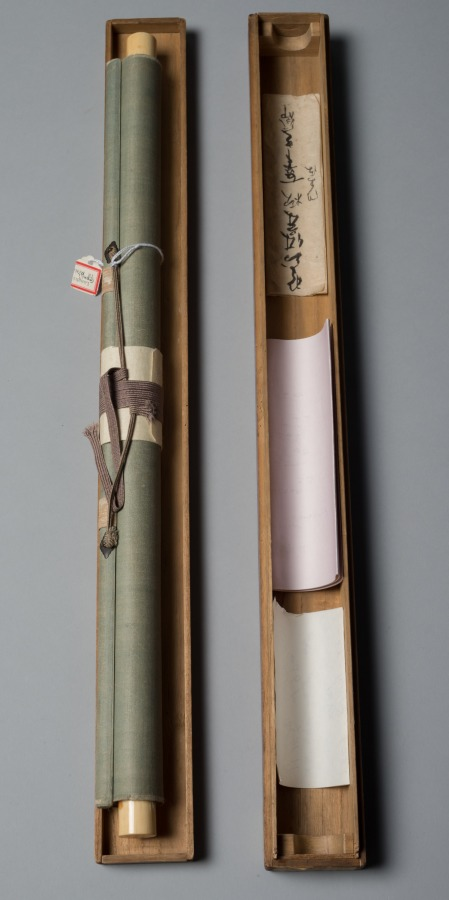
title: Section of an Illustrated Tale of Genji Poetry Contest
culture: Japan, Muromachi period (1392–1573)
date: 1400s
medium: section of a handscroll mounted as a hanging scroll; ink on paper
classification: Painting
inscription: 四十六番 左 ひげくろの大将 心さえ空にみだれし雪の［も」夜に ひとりさえつるかたしきの袖／ 四十七番 うきことを思ひさわ げばさまざまに くゆるけむりぞ いとど たち そふ／ 四十八番 すがくれてかず にも あらぬ かりのこを いづかたにかはとりかくすべき／ 右 雲井のかり かぎりとてわすれがたきを わするるも こや世に なびくこころな るらむ／ あさきなを いひ ながしける かわ ぐちは いかが もらしし せきのあらがき／ あわれをもいかに しりてか なぐさ めむ あるや 恋しき なきや かなしきに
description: This hanging scroll was once part of a handscroll depicting a waka (thirty-one syllable verse) poetry contest between characters from the 11th-century literary classic Tale of Genji. In this section, a woman known informally as Kumoi no kari, or “Goose in Fog,” after a lovelorn line she hums in the novel, is pitted against Higekuro no taishō, or “General Blackbeard.” Three of his poems, numbered 46 to 48, from “The Handsome Pillar” chapter appear over his image. The subsequent three poems inscribed above Kumoi no kari are presented as her “responses,” and come from "The Plum Tree Branch", “New Wisteria Leaves”, and "Evening Mist" chapters.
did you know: General Blackbeard laments having smelly ash poured upon him by his angry wife in one of the poems.